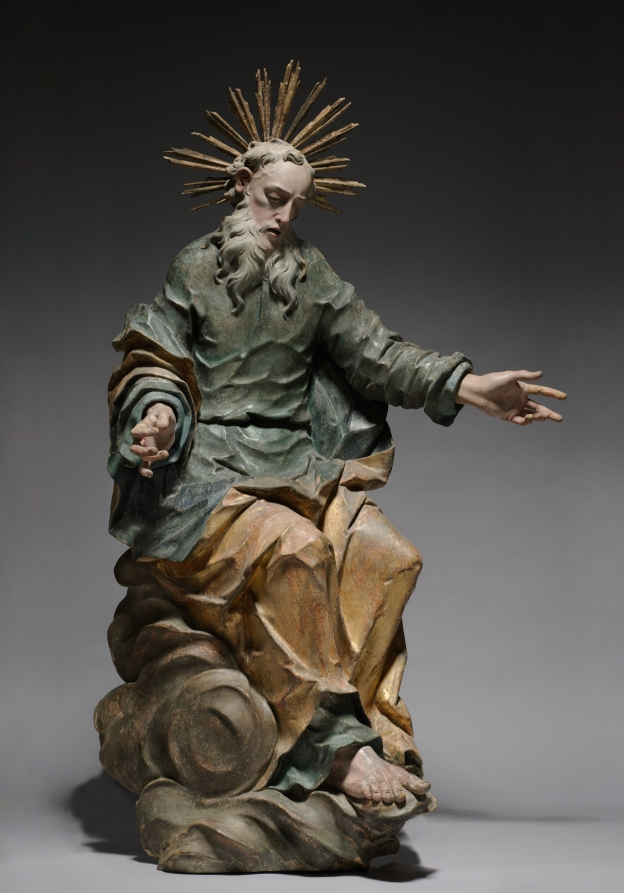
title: God the Father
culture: Austria, Lambach, 18th century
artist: Johann Peter Schwanthaler (Austrian, 1720–1795)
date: c. 1760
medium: painted and gilded wood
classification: Sculpture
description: Johann Peter Schwanthaler belonged to a renowned family of sculptors that produced works for religious and domestic settings throughout Bavaria, Austria, and southern Germany for more than 250 years. This imposing image of God the Father would have formed part of a larger group, probably at the top of an altar. The figure displays the characteristic features of Schwanthaler’s style, such as the elongated figural proportions, sharp-edged drapery folds, and the beautifully expressive, anatomically detailed hands.